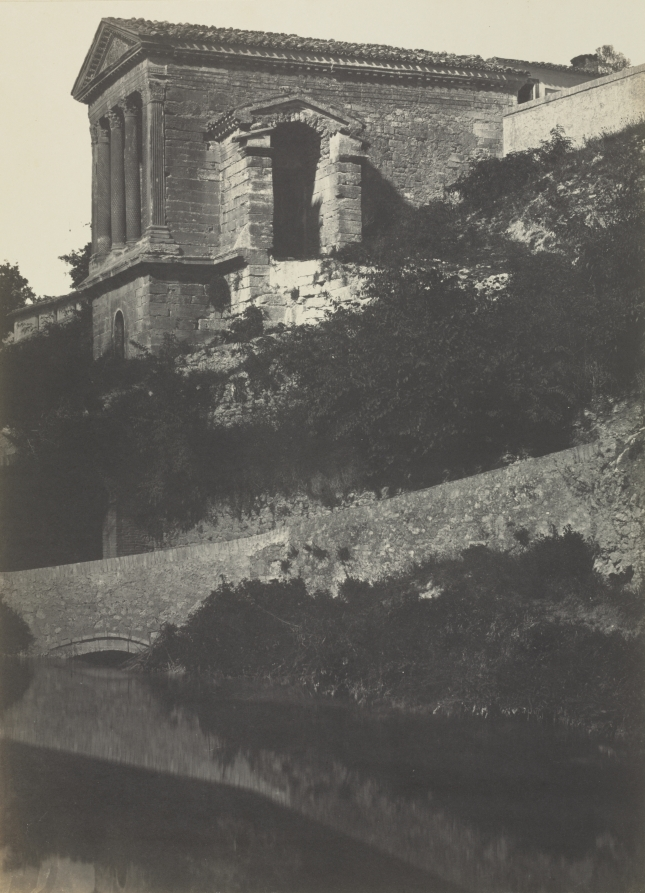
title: Temple of Clitumnus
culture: England, 19th century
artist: Robert Macpherson (British, 1811–1872)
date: c. 1857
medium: albumen print from wet collodion negative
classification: Photograph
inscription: Written in pencil on recto of mount: "137"; in pencil on verso of mount: "A18"; "Temple of Clitumnus"